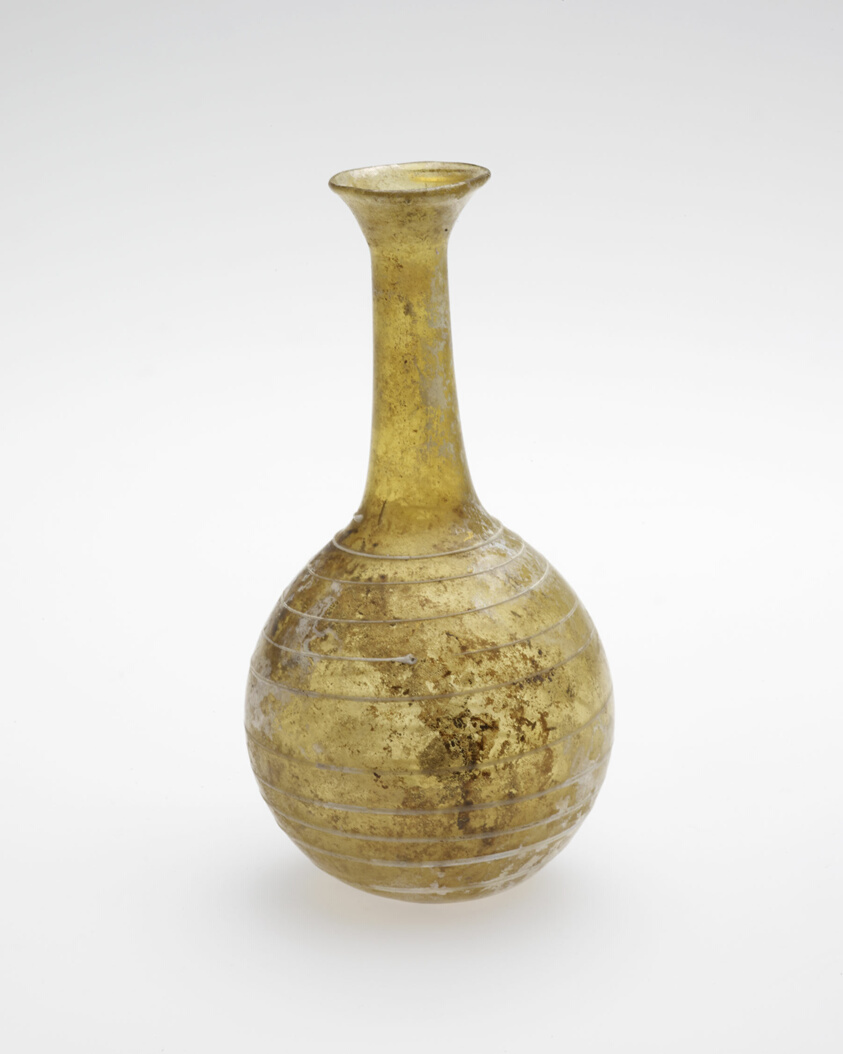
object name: Vessel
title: Bottle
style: roman (ancient, style or period), ancient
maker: Roman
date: Late 1st century BCE-early 1st century CE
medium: Glass, blown technique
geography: Mediterranean Region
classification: bottle; glass; vessel; ancient art